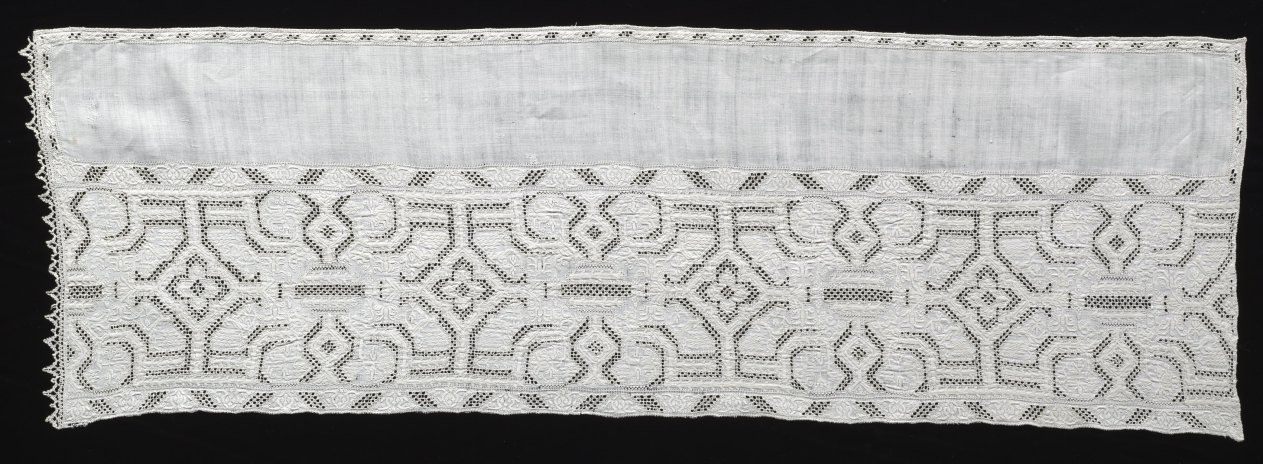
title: Lace Panel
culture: Italy, Padua and Venice, 16th century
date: 1560–99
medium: Linen: needle lace (cutwork) and bobbin lace edging and embroidery (satin stitch [Punto Reale])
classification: Lace